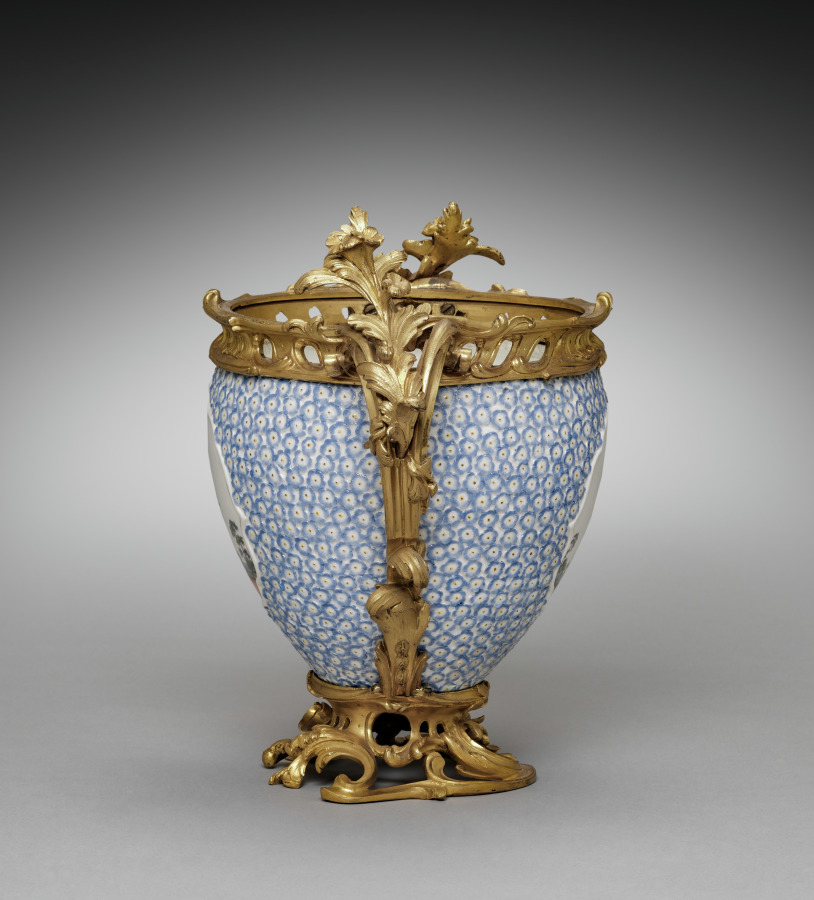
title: Vase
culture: Germany, 18th century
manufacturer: Meissen Porcelain Factory (German, est. c. 1710)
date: 1749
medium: porcelain mounted in gilt bronze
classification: Ceramic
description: One of these vases is dated 1749. They were perhaps part of a set of four covered vases that we know from documents were acquired by Mme. de Pompadour, mistress of Louis XV in 1752.